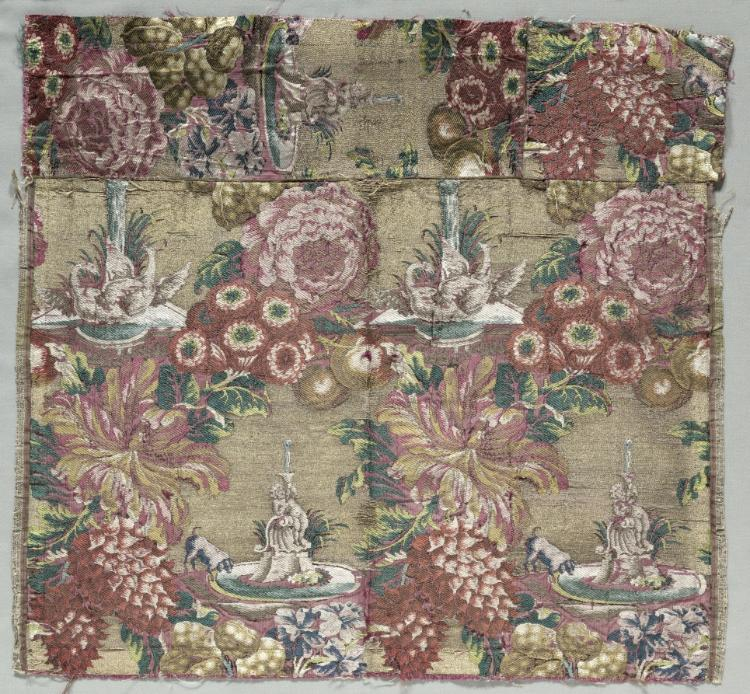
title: Silk Fragment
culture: Italy, 18th century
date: c. 1735–1740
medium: silk; brocaded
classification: Textile